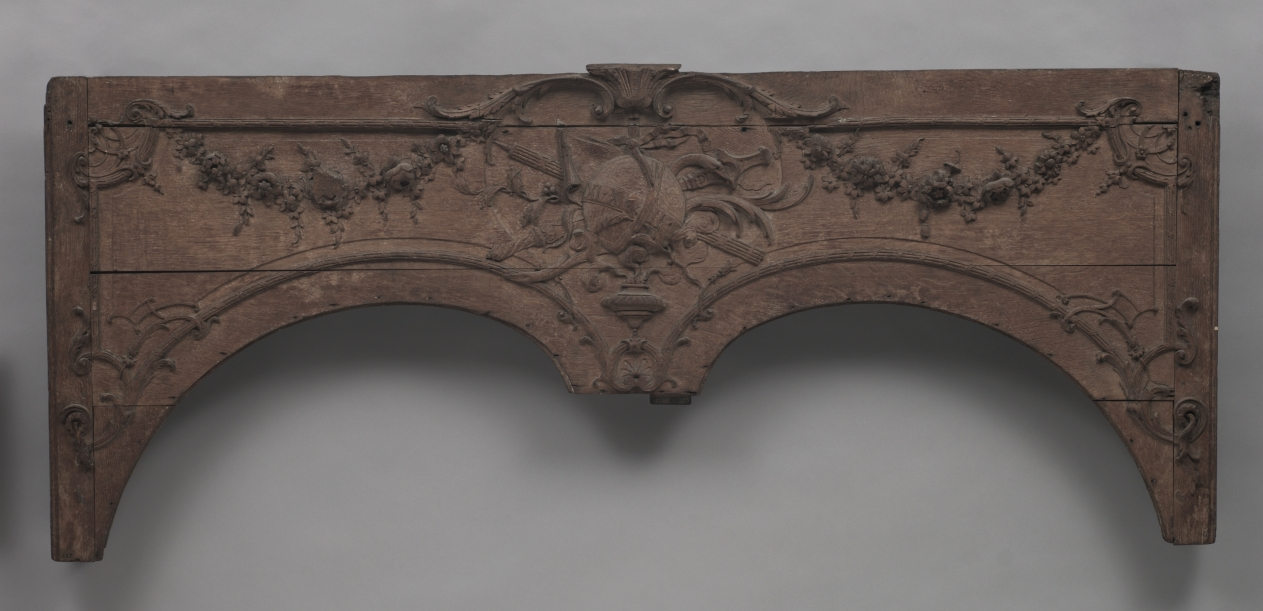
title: Panel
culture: France, Regency Period, 18th Century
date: 1715–1723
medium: wood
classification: Furniture and woodwork